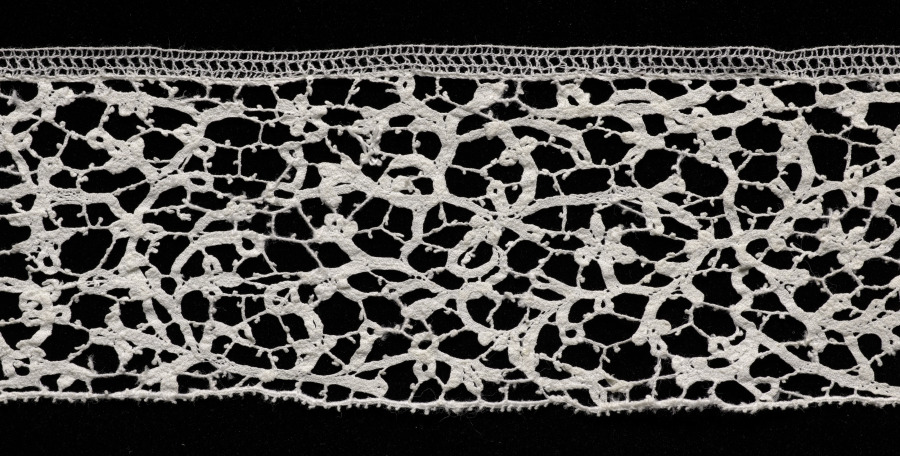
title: Lace Edging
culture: Italy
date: 1600s–1700s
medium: Bobbin lace (tape lace, similar to coralline point)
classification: Lace